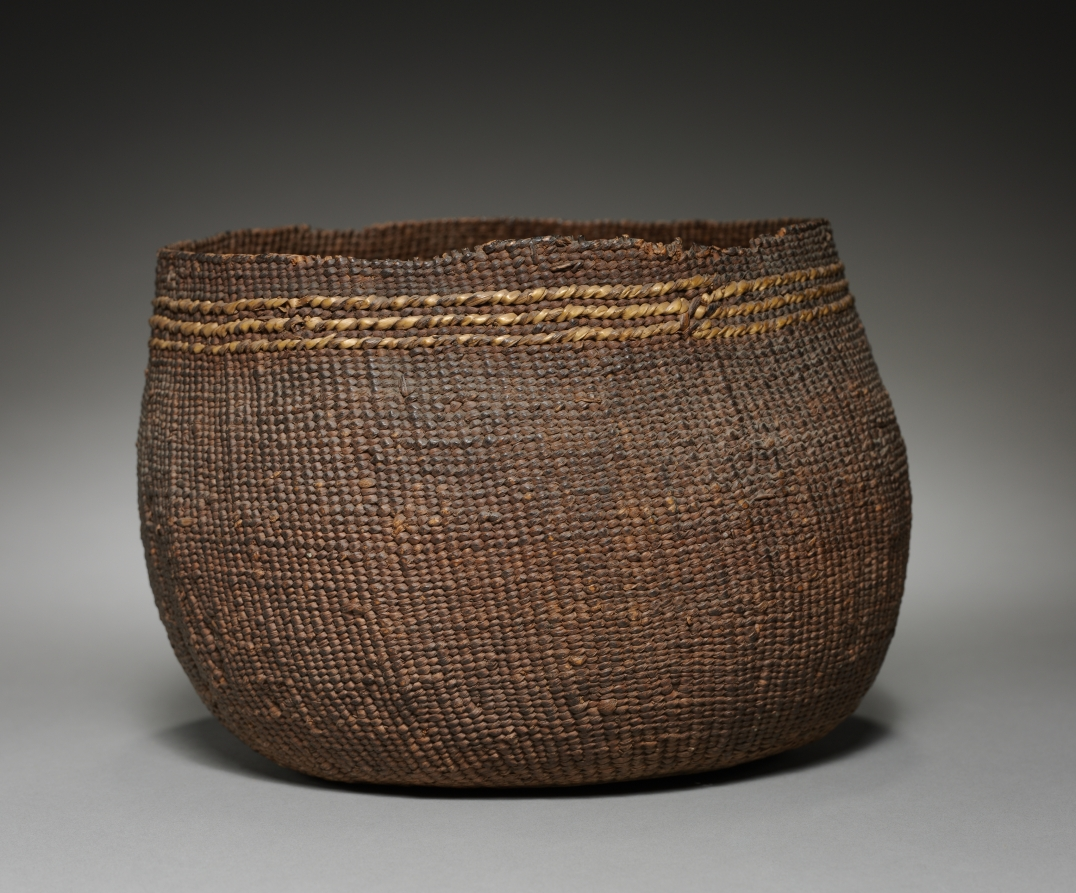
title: Cooking Bowl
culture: California (?), Native American, Unassigned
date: before 1927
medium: twined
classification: Basketry